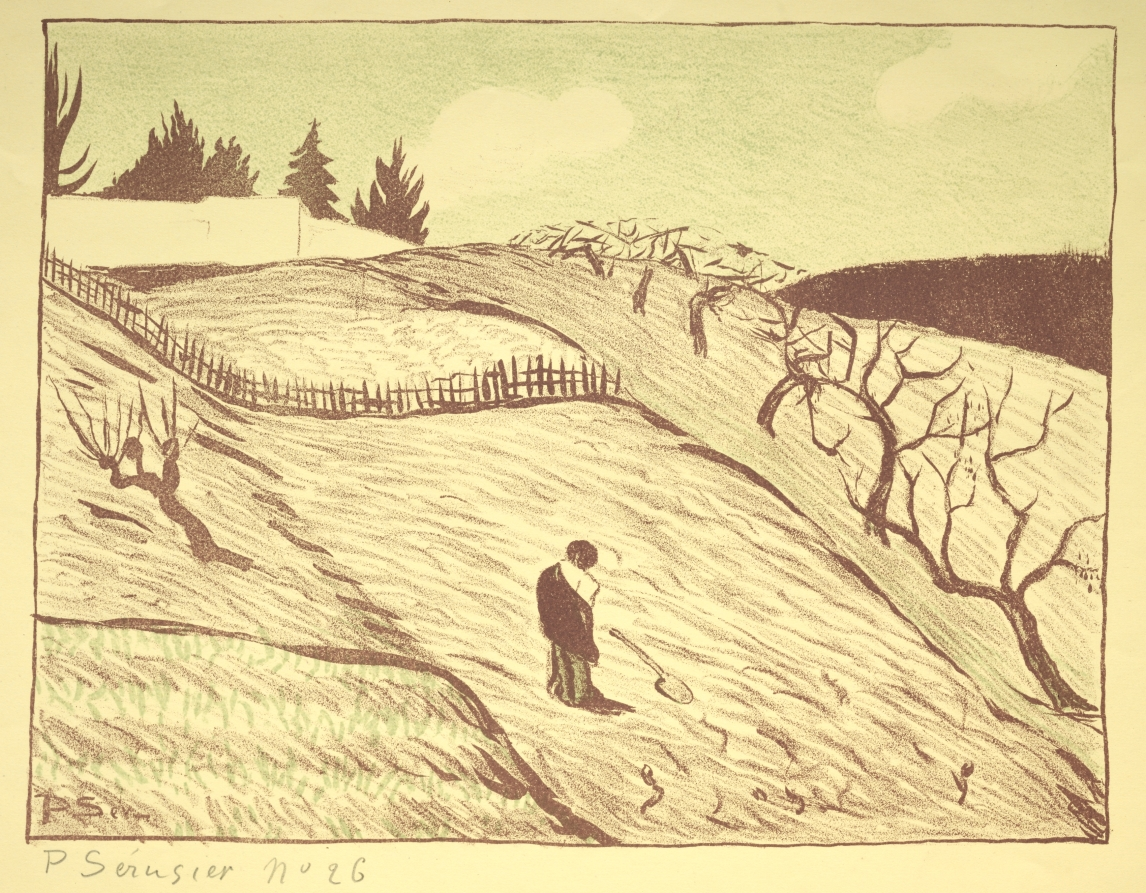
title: Landscape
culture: France, 19th century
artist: Louis Paul Henri Sérusier (French, 1864–1927)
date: 1893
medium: lithograph printed in green and brown on yellow paper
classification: Print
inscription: lower left, in graphite: P. Sérusier no 26; lower margin, in graphite: litho originale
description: Twenty-four-year-old Paul Sérusier met Paul Gauguin in Brittany at the artists' colony in Pont- Aven. Sérusier enthusiastically embraced the older artist's flat, simplified forms and bold colors. He became one of Gauguin's closest disciples, promoting his aesthetic among a group of Parisian artists who became known as the Nabis-the Hebrew word for "prophets"-because they predicted a new era in art. Sérusier was primarily interested in creating decorative surfaces which juxtaposed flat planes of opposing colors. Sérusier made only a few prints during his career, but the bold, primitive-looking Breton Landscape was selected for publication in L'estampe originale, a quarterly publication of original prints that appeared from 1893 to 1895. Breton Landscape pays homage to Gauguin's Volpini Suite, a series of eleven zincographs printed on canary yellow paper in 1889. The high horizon, tilted ground, winding fence, and geometric shapes of the fields echo details in Gauguin's Breton Women by a Fence.